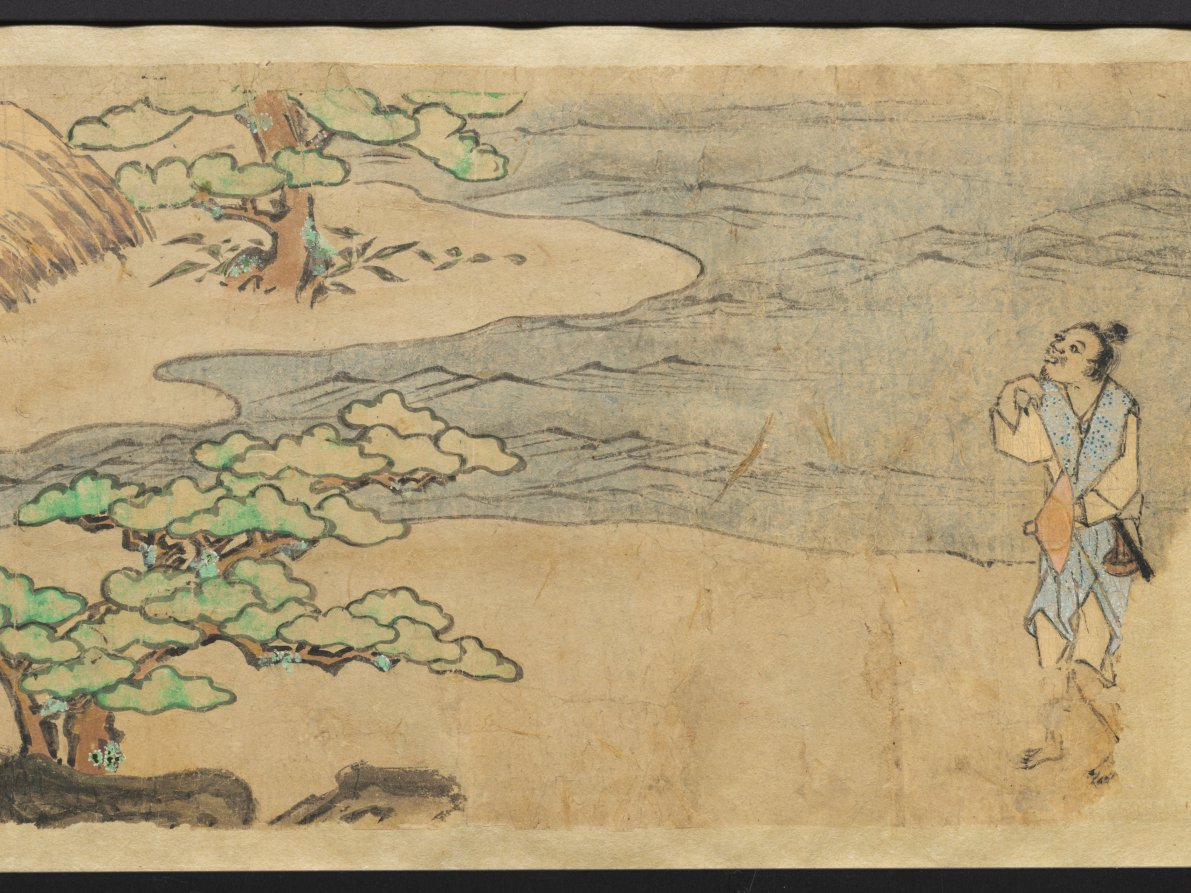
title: The Saltmaker's Story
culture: Japan, Edo period (1615–1868)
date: early 1600s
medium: One of a pair of handscrolls; ink, color, and gold on paper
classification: Painting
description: Once read and copied by girls at New Year’s celebrations and included in dowries, The Saltmaker’s Story is a rags-to-riches tale in which daughters are gifts from the gods. Despite his simple outlook, the main character progresses from humble roots as an associate at Kashima Shrine to the elite status of grandfather of the emperor through the intervention of the Kashima deity. The Saltmaker’s Story is traditionally presented in a set of three scrolls, but the text of this set has been removed by a previous owner, who remounted the illustrations as a pair. The paintings of this one take us from right to left through the first half of the tale.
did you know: This handscroll originally had texts before its paintings, but the texts were removed.